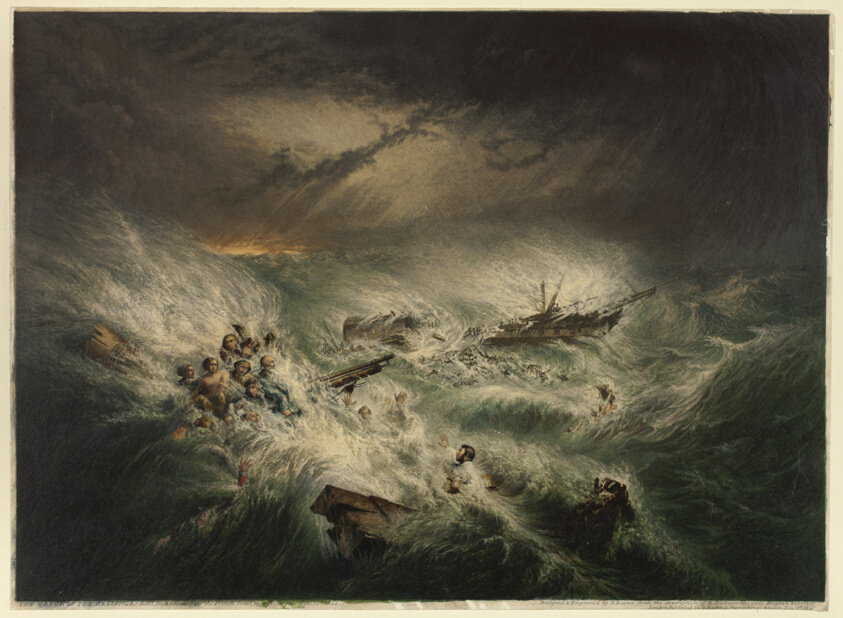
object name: Print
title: The Wreck of the Reliance (November 12, 1842)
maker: George Baxter (English, 1804-1867)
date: November 1, 1843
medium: Steel engraving colored with wood-blocks in oil-based inks on paper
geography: England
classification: wood engraving; print; prints and drawing